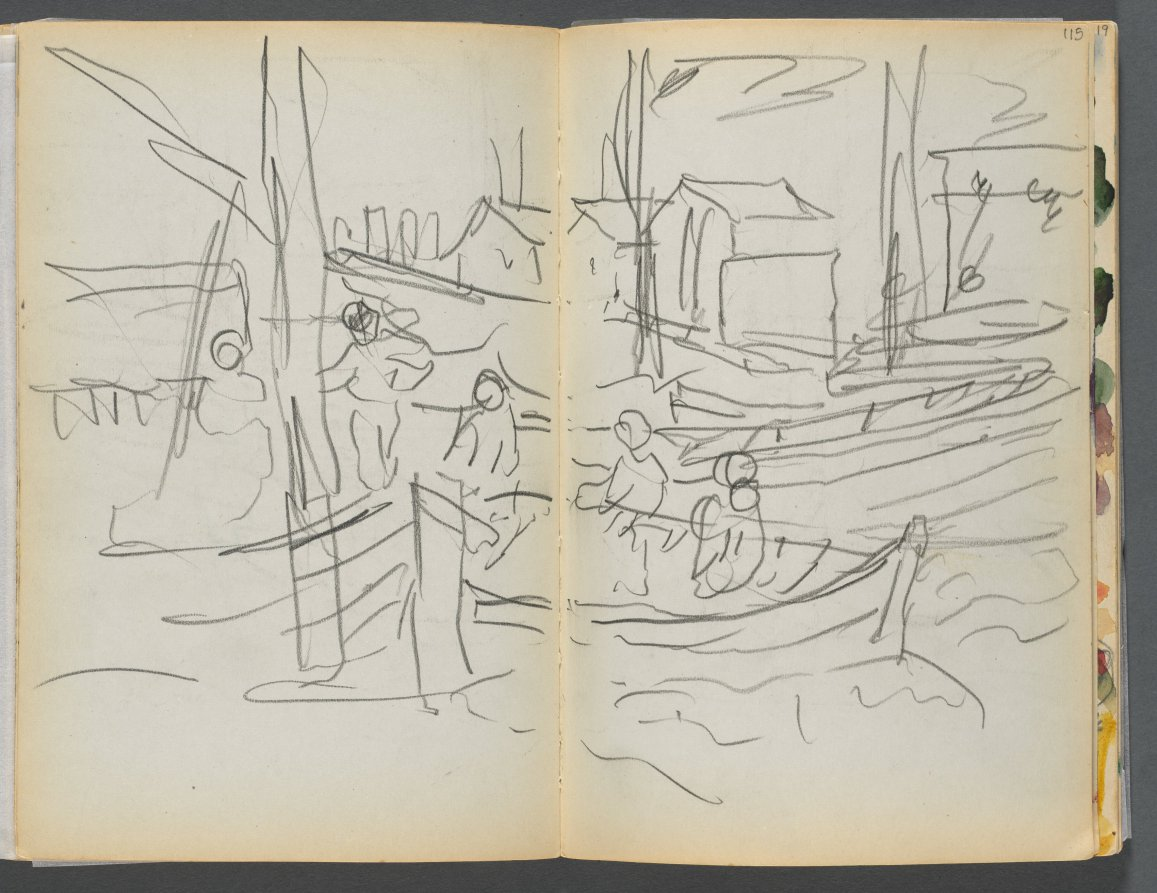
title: Sketchbook- The Granite Shore Hotel, Rockport, page 114 &115: Figures on a Sailboat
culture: America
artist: Maurice Prendergast (American, born Newfoundland [now Canada], 1858–1924)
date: 1905–10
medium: graphite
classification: Bound Volume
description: This sketchbook contains 72 pages of pencil drawings and 9 watercolors of Cape Ann. On the inside of the cover Prendergast wrote the address of the Granite Shore Hotel in Rockport, Massachusetts.